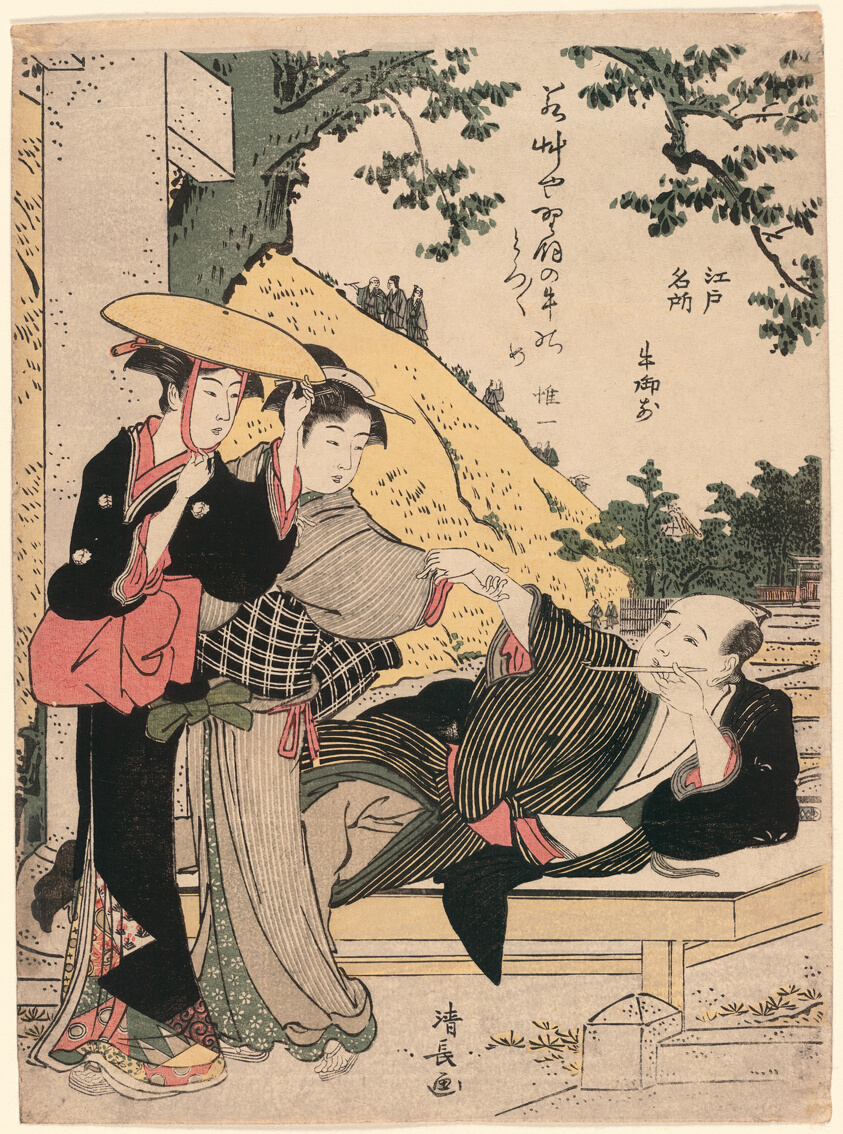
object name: Print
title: Ushi-no-gozen, from the series "Famous Places of Edo (Edo meisho)"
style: Japanese (culture or style)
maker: Torii Kiyonaga (Japanese, 1752-1815)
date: c. 1783/84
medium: Color woodblock print; chuban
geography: Japan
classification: woodblock print; print; asian art